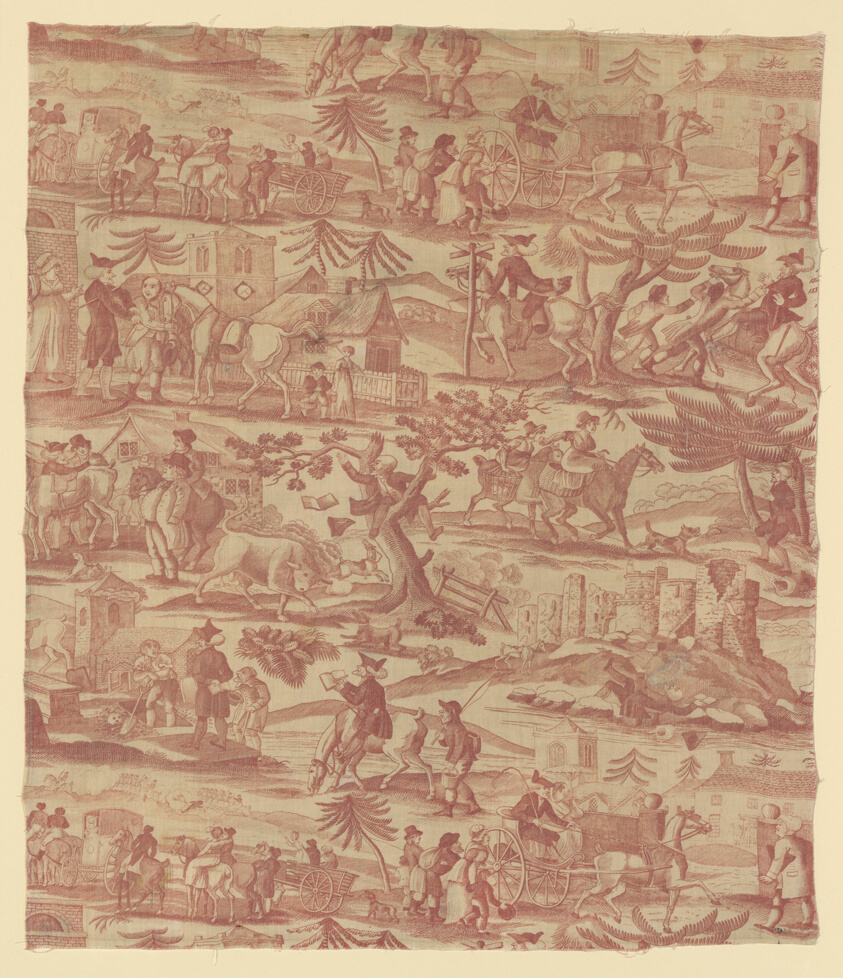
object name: Textile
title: The Travels of Doctor Syntax (Furnishing Fabric)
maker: After works by Thomas Rowlandson (English, 1756–1827); England, Manchester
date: c. 1820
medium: Cotton, plain weave; probably engraved roller printed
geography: Manchester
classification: textile; weaving - printed; furnishing textile